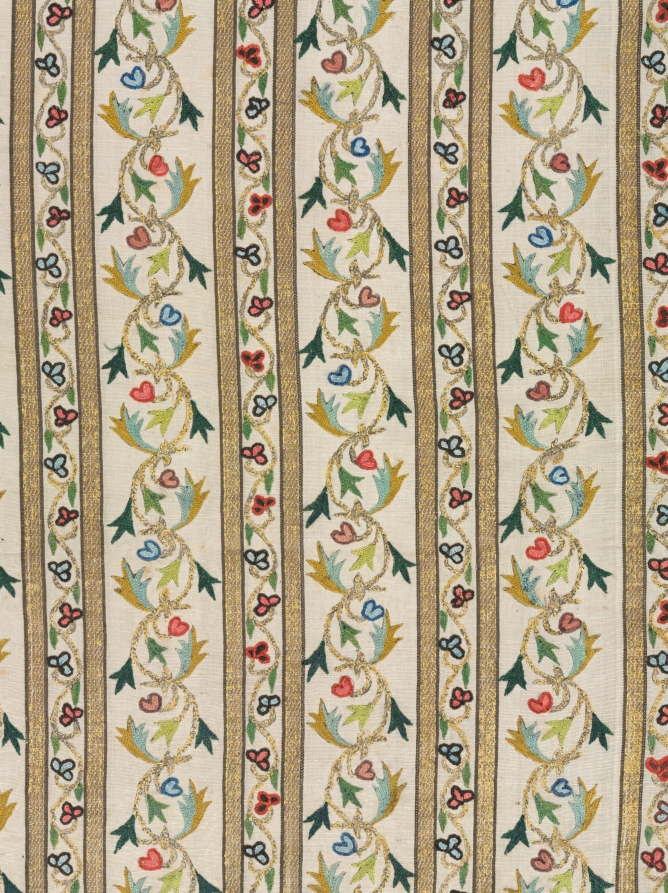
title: Woman's robe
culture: Turkey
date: 1800s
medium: striped fabric; plain weave: silk; embroidery, chain stitch: silk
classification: Garment